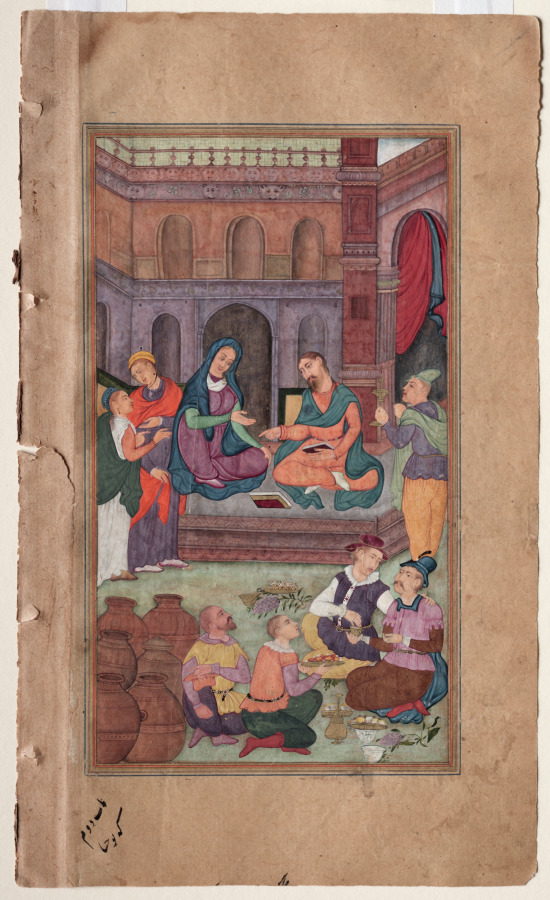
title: The Marriage at Cana (folio 58 verso), from a Mirror of Holiness (Mir’at al-quds) of Father Jerome Xavier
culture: Mughal India, Allahabad, made for Prince Salim (1569–1627)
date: 1602–4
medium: Gum tempera, ink, color, and gold on paper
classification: Manuscript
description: Mary and Jesus sit in places of honor at the wedding of her relatives in Cana in front of a building facade ornamented at the top with charming rows of animal faces. The text specifies that there were six water jars at the gathering, as depicted in the lower left. The wine master in the yellow tunic gestures to the jars, as he admonishes the host for saving the good wine for last. The dumbstruck host, who knew there was no more wine, has discovered that Jesus miraculously transformed the water into wine. The figure wearing the crimson velvet hat with his hand on the host’s shoulder is probably the groom. The miracle inspired him to leave his bride a virgin and follow Christ as the apostle John.